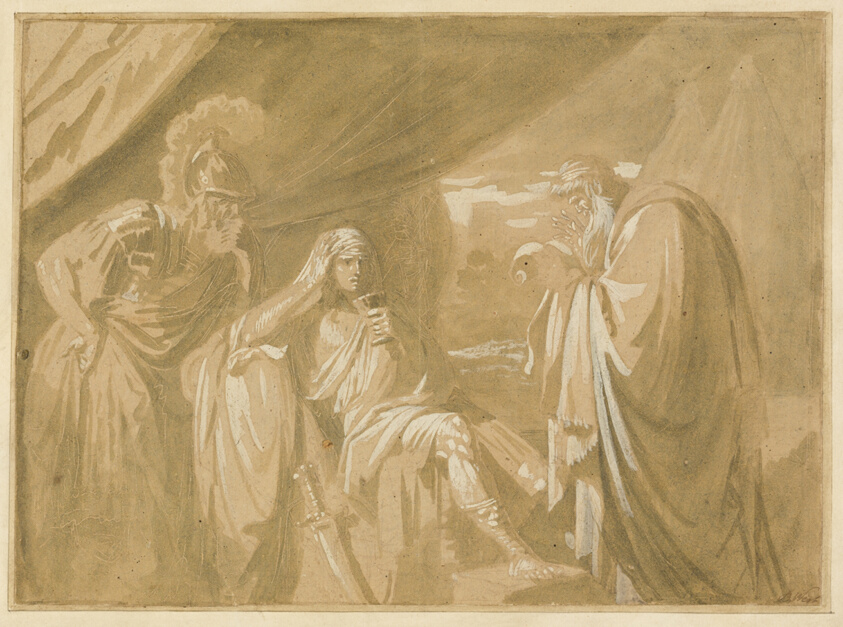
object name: Drawing and Watercolor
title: Alexander's Confidence with his Physician Philip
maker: Benjamin West (American, 1738-1820)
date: c. 1770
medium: Brush and brown and black wash, with tan gouache, heightened with white gouache, with incising, on ivory laid paper, laid down on ivory laid card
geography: United States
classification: wash; drawings (visual works); prints and drawing